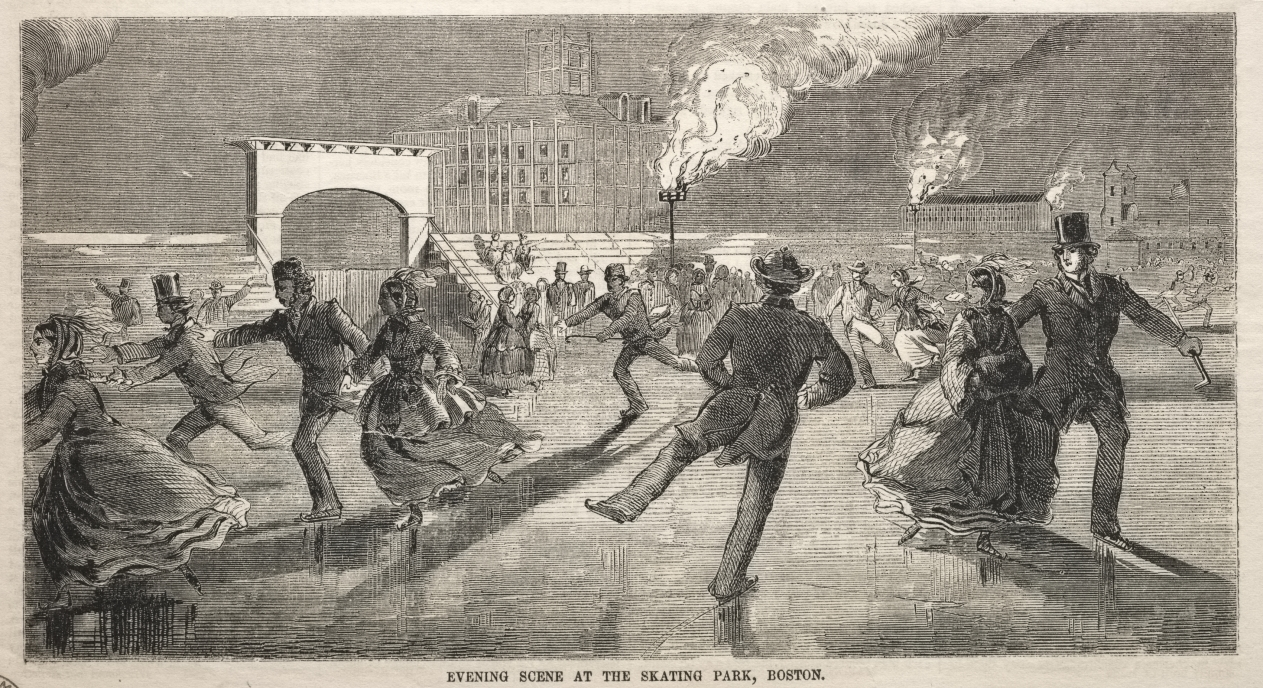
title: Evening Scene at the Skating Park, Boston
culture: America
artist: Winslow Homer (American, 1836–1910)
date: 1859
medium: wood engraving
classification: Print